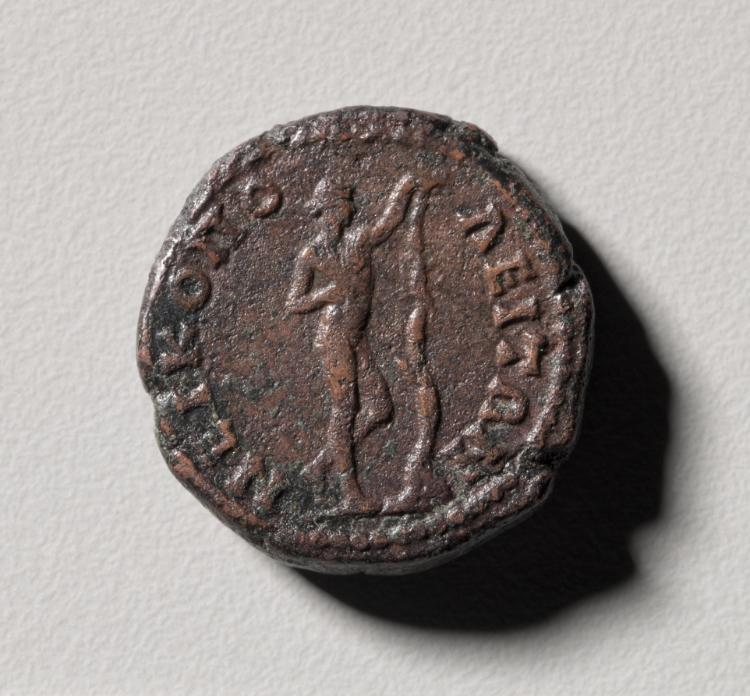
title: As: Apollo Sauroktonos, Tree (reverse)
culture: Roman, minted at Nikopolis He Pros Istron (Moesia Inferior)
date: 138–61 CE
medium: bronze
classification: Coins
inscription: ΝΕΙΚΟΠΟ - ΛΕΙΤΩΝ